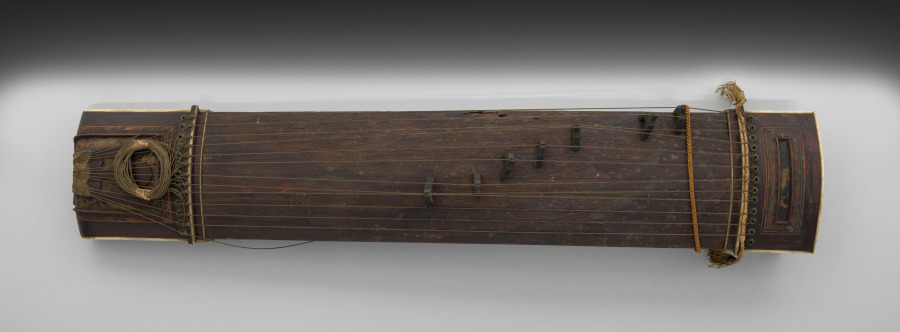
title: Koto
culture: Japan, Edo period (1615–1868)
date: early to mid-1800s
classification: Musical Instrument